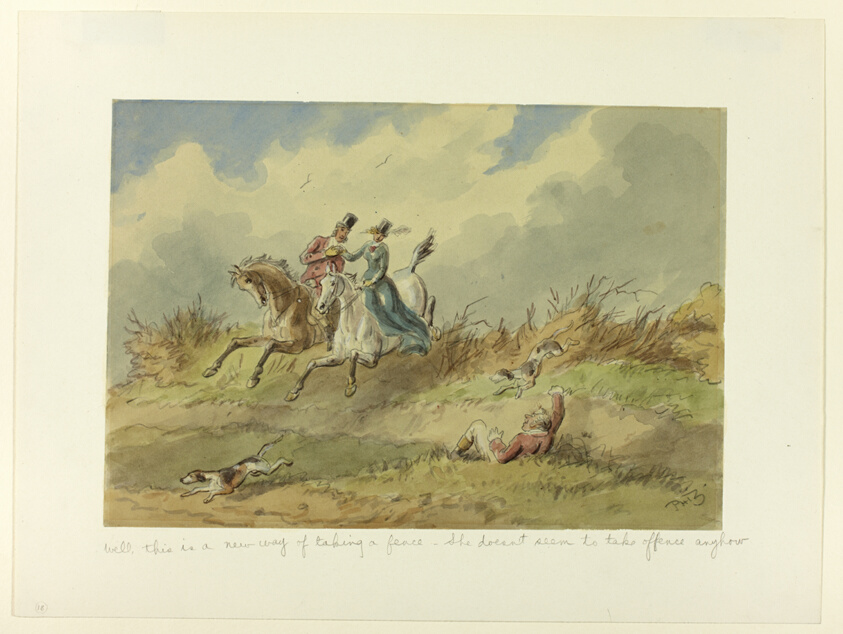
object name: Drawing and Watercolor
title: Well, This is a New Way of Taking a Fence-She Doesn't Seem to Take Offence Anyhow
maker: Hablot Knight Browne (English, 1815-1882)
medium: Watercolor, with graphite, heightened with touches of white gouache, on gray wove paper, perimeter mounted on ivory wove paper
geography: England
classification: watercolor; drawings (visual works); prints and drawing